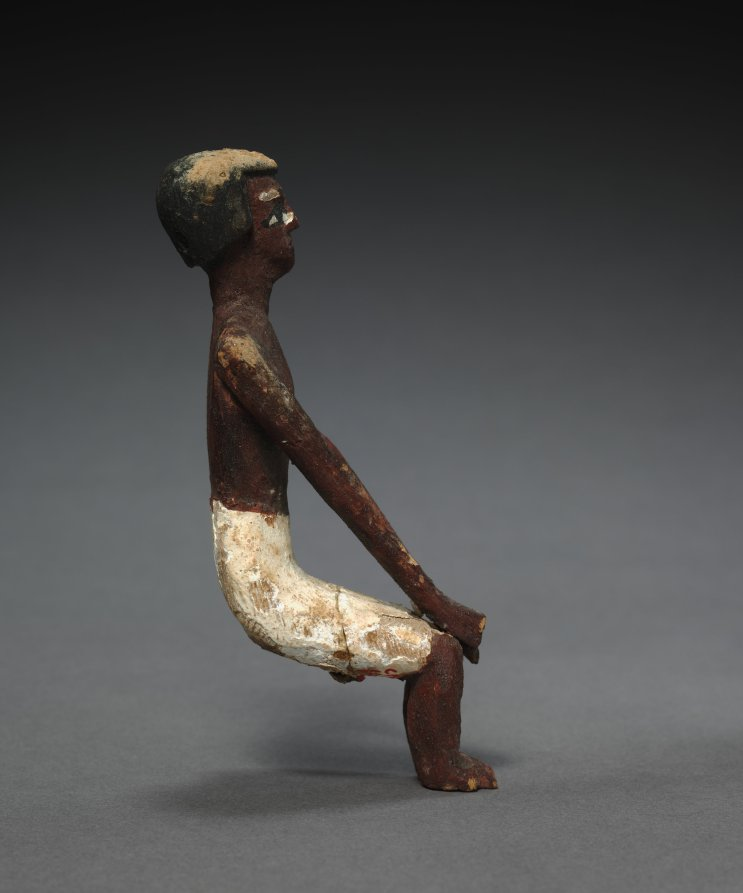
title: Seated Model Sailor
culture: Egypt, Middle Kingdom (2040–1648 BCE), Dynasties 11–12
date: c. 2000–1000 BCE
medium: painted sycamore fig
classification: Funerary Equipment